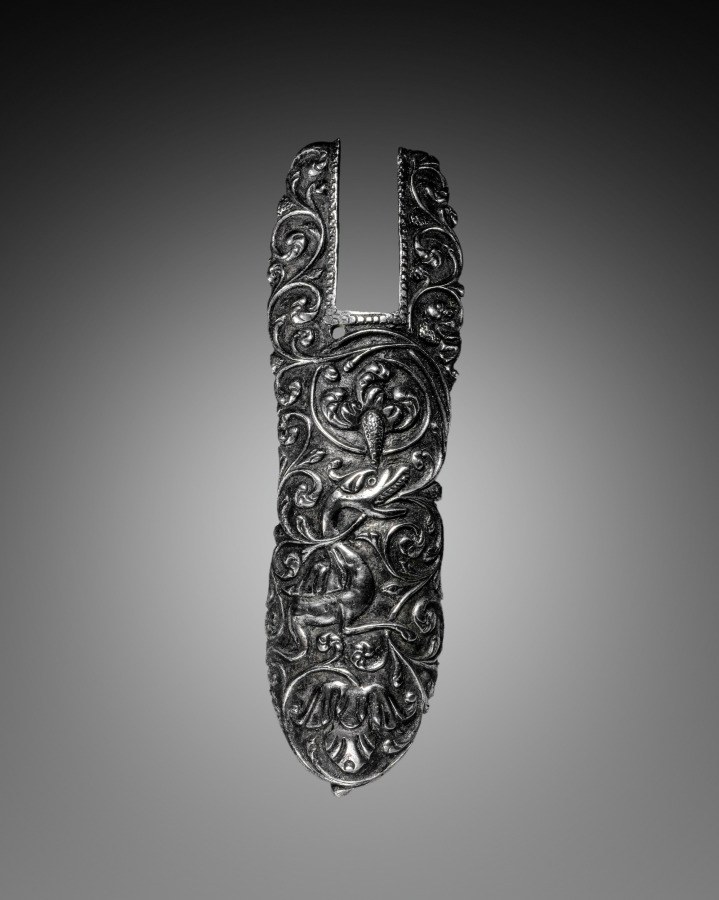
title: Mount for the Upper Stock of a Flintlock Pistol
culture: Italy, Brescia (?), late 17th Century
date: c. 1680–1700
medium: chiseled steel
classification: Arms and Armor